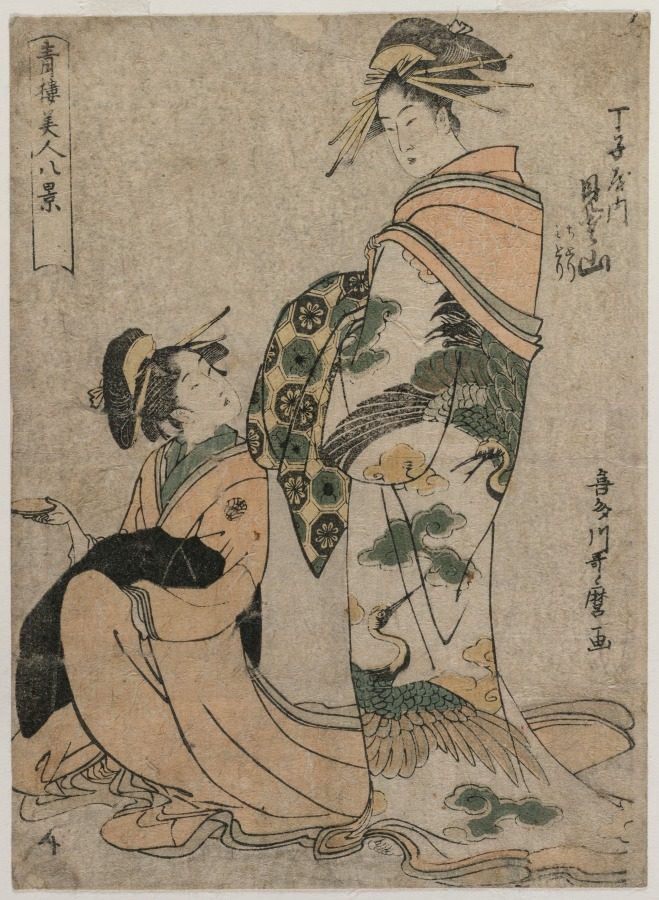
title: The Courtesan Misyama of Chojiya (from the series Eight Views of Beautiful Women of the Green Houses)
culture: Japan, Edo period (1615–1868)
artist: Kitagawa Utamaro (Japanese, c. 1754–1806)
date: early 1790s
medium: color woodblock print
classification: Print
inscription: Signature: Kitagawa Utamaro ga Publisher: Yamguchiya Chusuke (emblem)